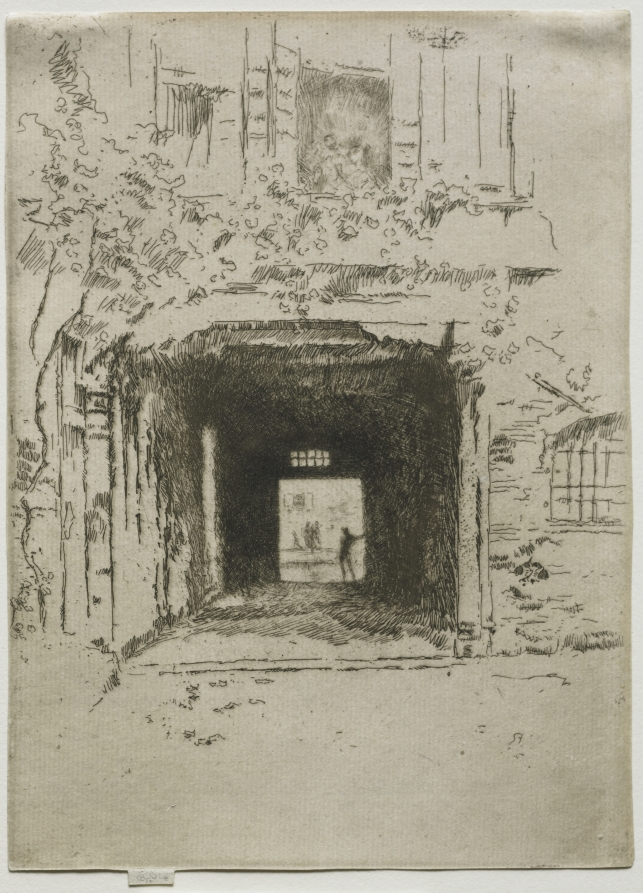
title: Doorway and Vine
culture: America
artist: James McNeill Whistler (American, 1834–1903)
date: 1886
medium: etching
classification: Print